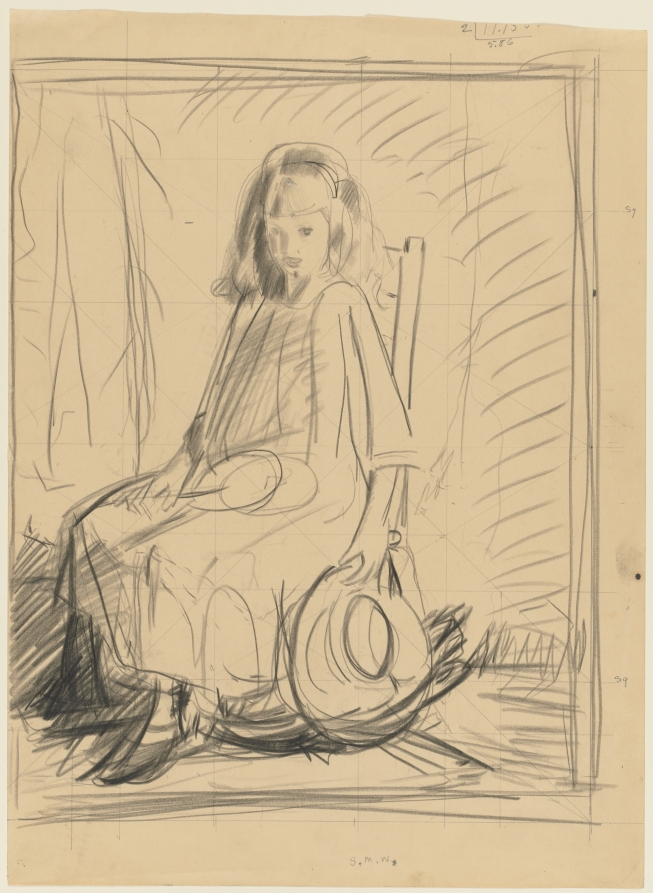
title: Anne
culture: America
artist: George Bellows (American, 1882–1925)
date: 1920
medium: pencil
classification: Drawing